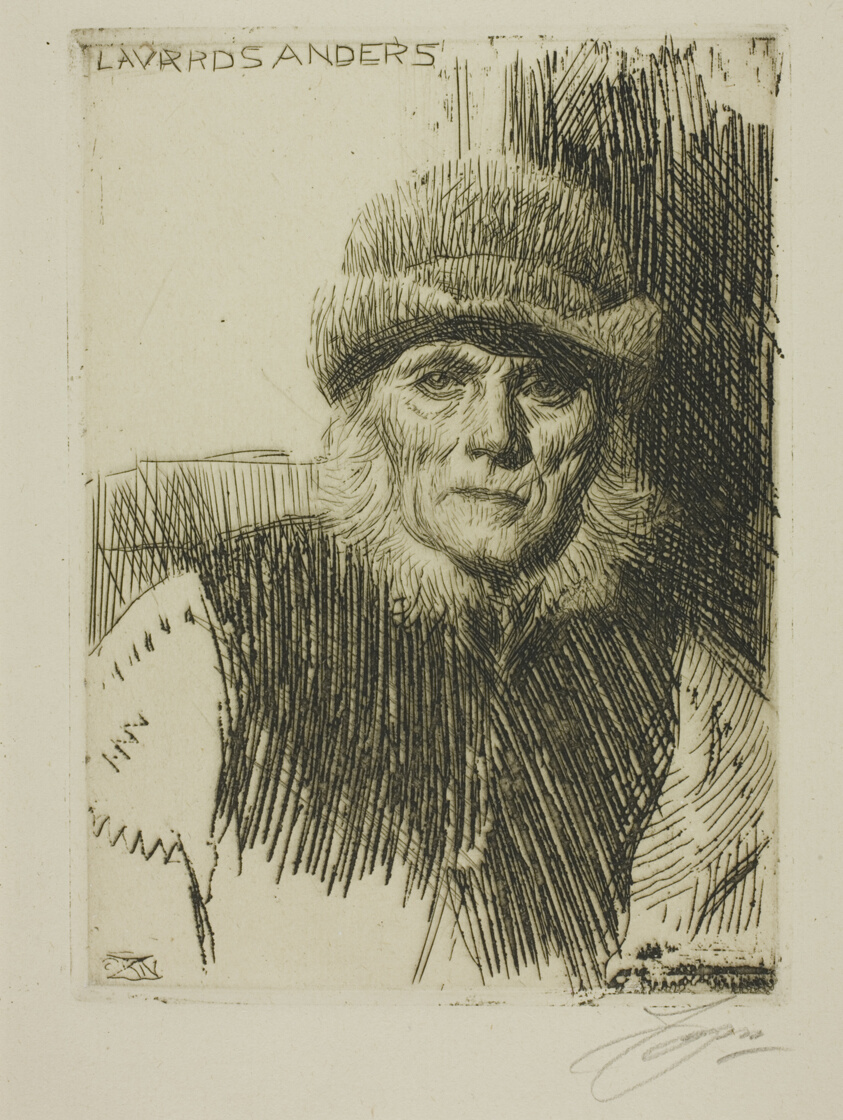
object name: Print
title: Dalecarlian Peasant (Lavards Anders)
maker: Anders Zorn (Swedish, 1860-1920)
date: 1919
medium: Etching on ivory laid paper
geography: Sweden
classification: etching; print; prints and drawing